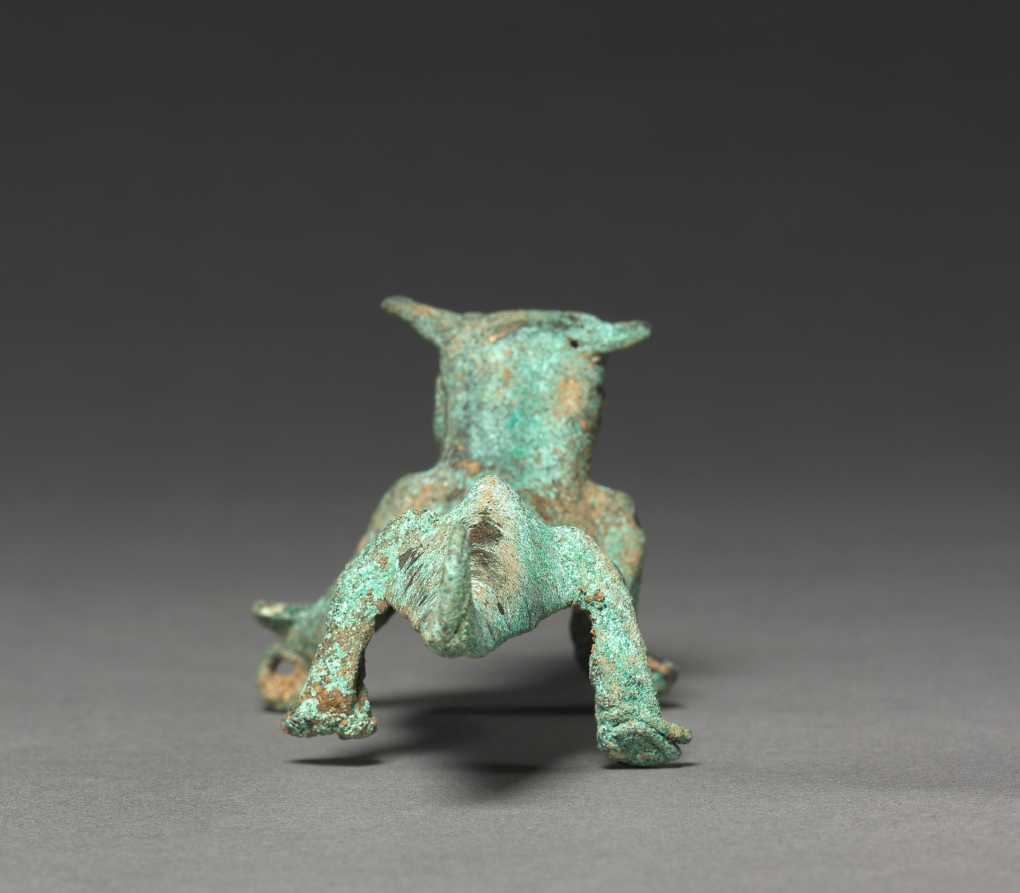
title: Jaguar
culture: Costa Rica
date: c. 1000–1500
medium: gold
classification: Metalwork